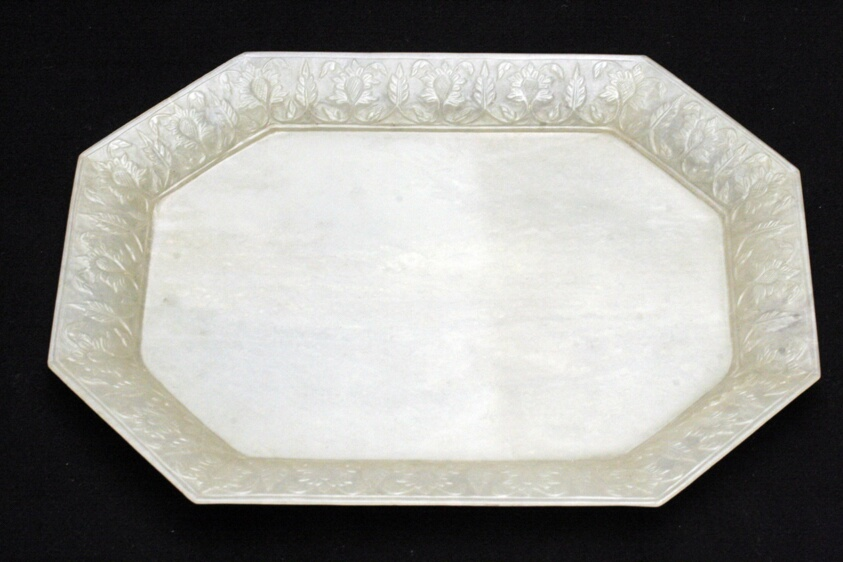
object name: Decorative Arts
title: Octagonal Serving Platter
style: South Asian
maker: India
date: 18th century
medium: Jade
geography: India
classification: vessel for serving food; jade; dish (vessel); asian art; decorative arts